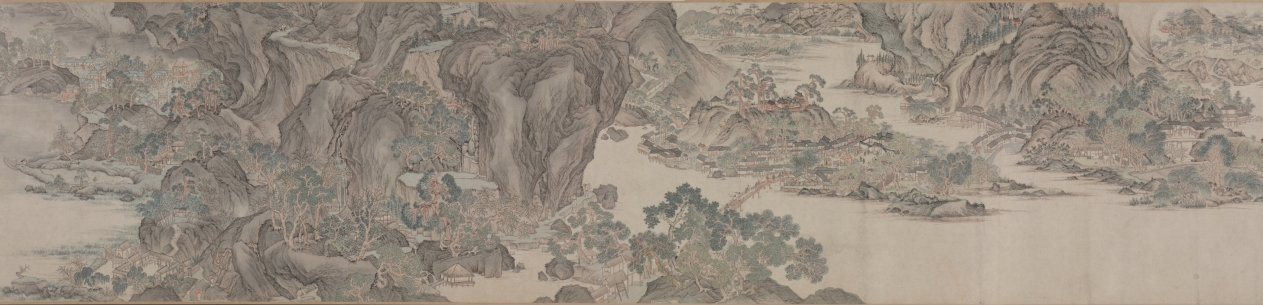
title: Greeting the Spring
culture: China, Ming dynasty (1368–1644)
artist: Wu Bin (Chinese, active c. 1591–1626)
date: 1600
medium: handscroll; ink and light color on paper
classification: Painting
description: This masterfully composed landscape in light colors and delicate brushwork is an image of the water-rich Jiangnan region in southeast China, where Wu Bin was active as an artist. Embedded in rolling hills along lakesides and streams nestle cityscapes hosting numerous spring festivities. Lantern displays and street performances in the villages salute the New Year, and are interwoven with scenes of farming, fishing, and silk making. In one scene in the middle ground, an ox made of clay under a canopy is lead in a procession to an architectural compound, a ceremony known as whipping the spring ox in hope for a good harvest. This handscroll bears five collector seals by the Qianlong emperor indicating his appreciation for the painting.